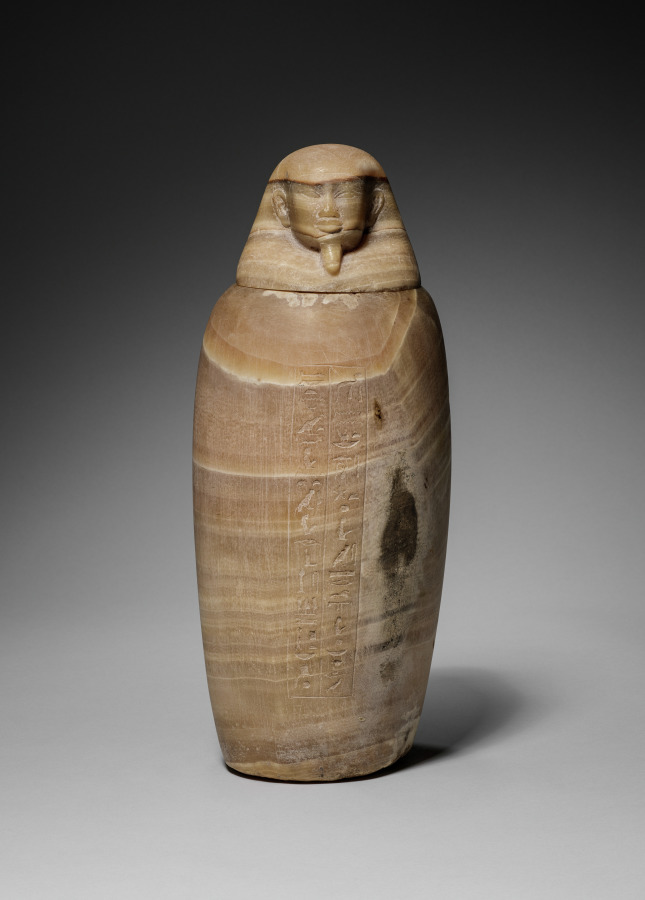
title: Canopic Jar with Man's Head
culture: Egypt, Late period (715–332 BCE), Dynasty 26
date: 664–525 BCE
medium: travertine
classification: Funerary Equipment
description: In the process of mummification, the liver, lungs, stomach, and intestines were removed, separately embalmed, and stored in specialized jars known as canopic jars (after a sailor in Greek mythology, who died at the town of Canopus in the Nile Delta and was worshipped there in the form of a human-headed jar). Each organ was identified with one of four funerary deities collectively known as the Sons of Horus: the liver with Imsety (man's head), the lungs with Hapy (baboon's head), the stomach with Duamutef (jackal's head), and the intestines with Qebehsenuef (falcon's head). It was their duty to protect the deceased and restore to him his body parts in the hereafter.